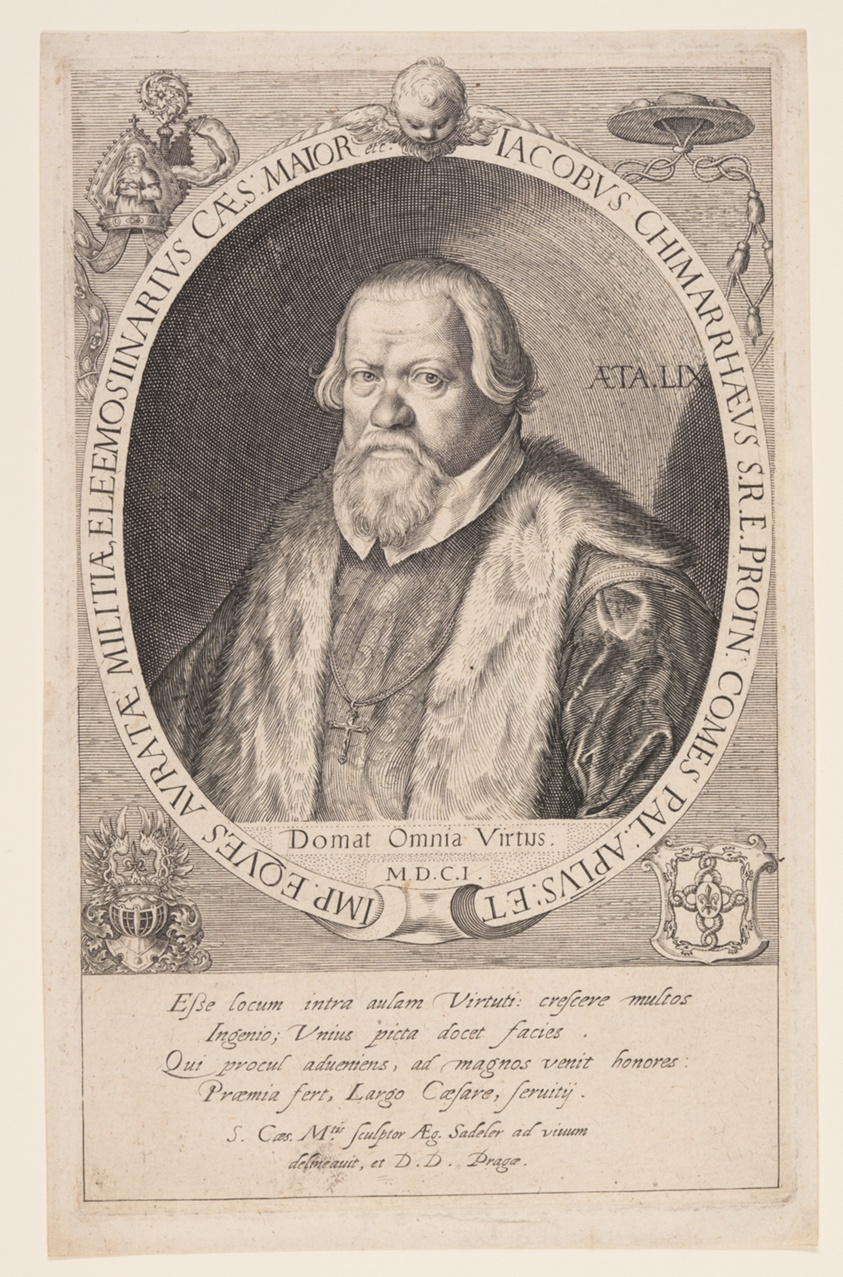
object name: Print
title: Jacob Chimarrhaeus, Grand Almoner of Rudolph II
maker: Aegidius Sadeler II; Flemish, c. 1570–1629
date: 1601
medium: Engraving on paper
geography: Flanders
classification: engraving; paper; print; prints and drawing